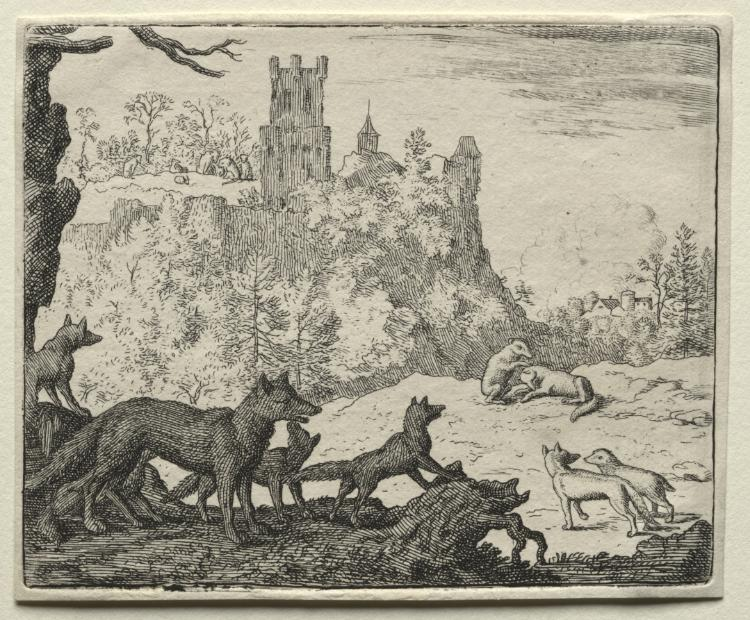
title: Reynard the Fox: Reynard and the Badger Depart for Court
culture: Netherlands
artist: Allart van Everdingen (Dutch, 1621–1675)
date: 1650–75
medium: etching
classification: Print